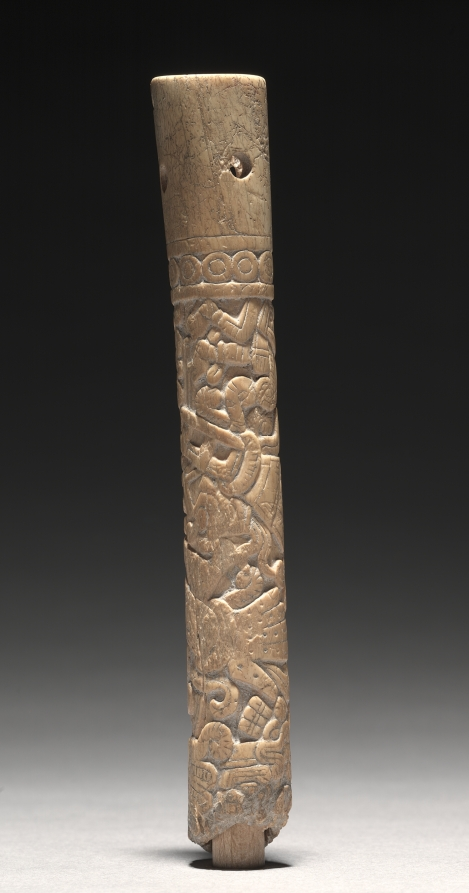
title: Carved Tube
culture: Mexico, Oaxaca, Mixtec, 13th-16th century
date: c. 1200–1519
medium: bone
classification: Jewelry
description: Carved in spiral registers, the ornamentation on this bone tube resembles Mixtec painting, both in codices (screenfold books) and architectural murals.